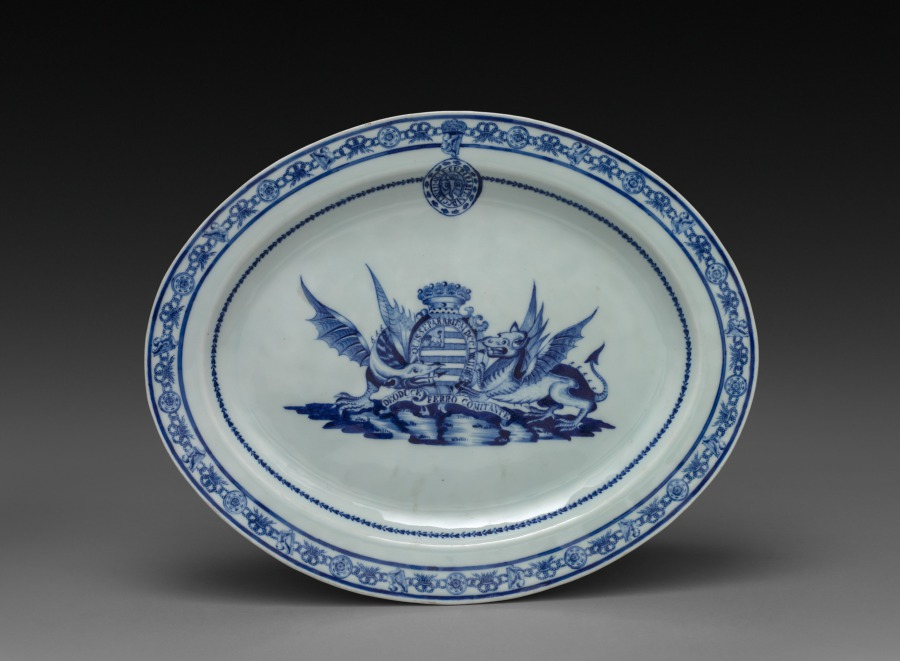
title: Platter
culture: China, Chinese Export, 18th century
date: 1783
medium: porcelain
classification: Ceramic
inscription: on the badge of the Order of Saint Patrick, above: "QUIS SEPARABIT, MDCCLXXXIII"; the central motif consists of the same badge as above flanked by winged dragons, and below, a ribbon with the inscription: "DEODUCE FERRO COMITANTE."